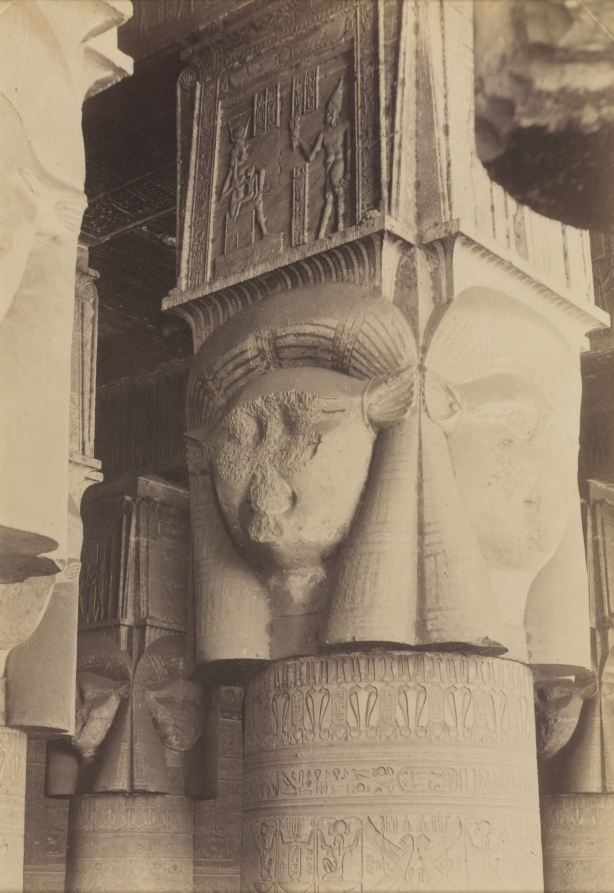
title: Dendera, Interior of the Temple, Hathor Capitals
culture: England, 19th century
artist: Antonio Beato (British, c. 1825–1903)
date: c. 1870s - 1880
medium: albumen print from wet collodion negative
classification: Photograph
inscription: Written in pencil on verso: "342 Denderah/Intérieur du temple/chapiteaux hathoriques"; "AB-5296-Z"